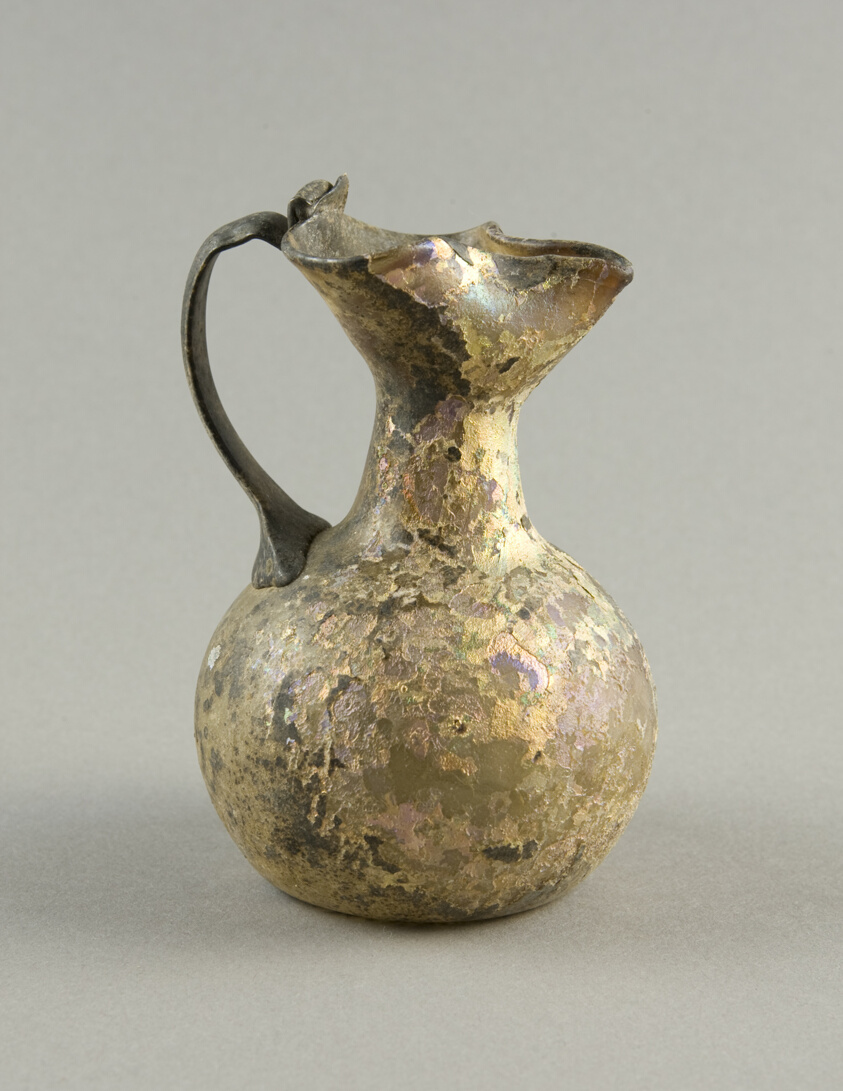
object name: Vessel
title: Pitcher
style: syrian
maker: Roman; Levant or Syria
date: 1st-5th century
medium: Glass, blown technique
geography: Syria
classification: fragment; vessel